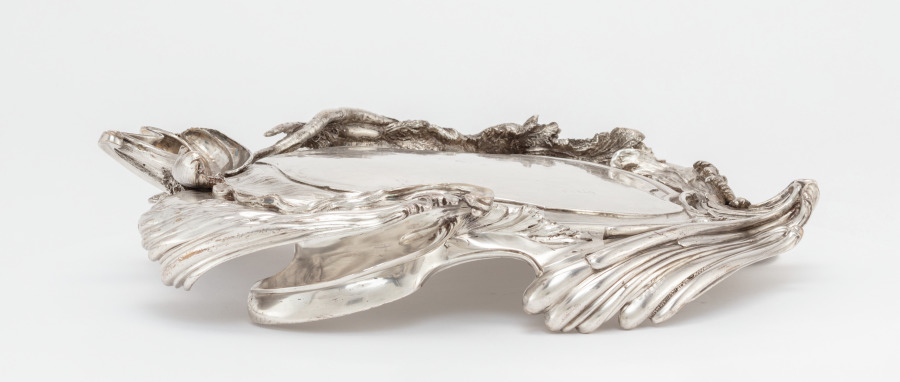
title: Stand for a Covered Tureen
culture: France, Paris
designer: Juste-Aurèle Meissonnier (French, 1695–1750)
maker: Pierre-François Bonnestrenne (French)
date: 1735–38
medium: silver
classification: Silver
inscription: engraved Meissonnier signature.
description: See entry for cover record 1977.182.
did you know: The langoustine, pigeon, and vegetables were cast using real examples giving the silver copies lifelike detail and appearance.